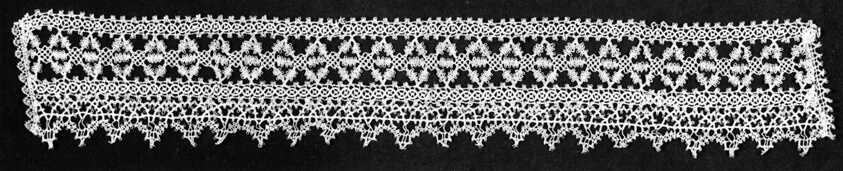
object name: Textile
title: Border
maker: Italy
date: 1525/75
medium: Gilt-metal-strip-wrapped silk, bobbin straight lace; edged with points of bobbin straight lace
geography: Italy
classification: textile; lace - bobbin